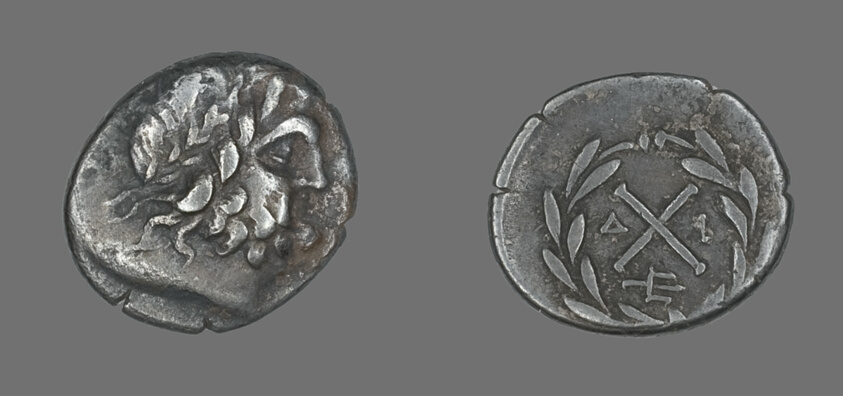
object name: Coin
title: Hemidrachm (Coin) Depicting the God Zeus Amarios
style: greek, ancient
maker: Greek, minted in Mantineia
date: before 222 BCE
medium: Silver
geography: Mantinea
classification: coin; ancient art